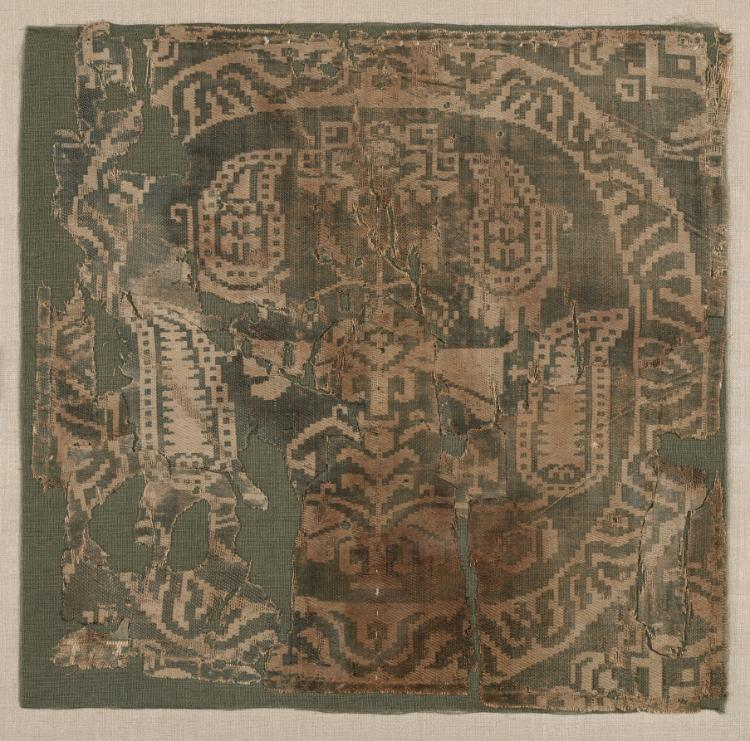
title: Roundel from a Tunic with Palmette Tree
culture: Egypt or Syria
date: 700s–800s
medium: Silk; complementary weft-faced twill weave with inner warps (samite)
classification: Textile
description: Four or six squares of this luxurious two-color silk were originally sewn on a linen tunic, two positioned above the hemline in the front and two in the back, and possibly two more at the shoulder. The folded edges are still visible, including a silk sewing thread on the right side. The brittle condition is evident in the numerous crisp breaks.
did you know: Originally designed in Byzantine Egypt or possibly Syria, patterns like this were woven throughout a period of two to four centuries.